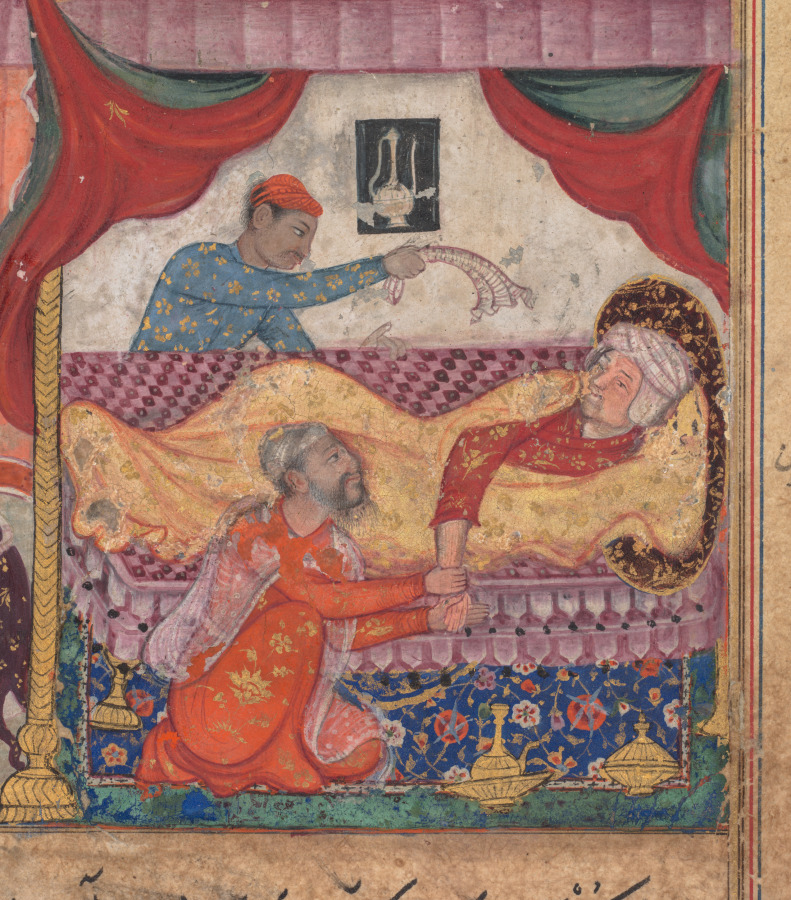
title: The monkey slain, his blood to be used as medicine for the ailing prince he has bitten, from a Tuti-nama (Tales of a Parrot): Fifth Night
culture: Mughal India, court of Akbar (reigned 1556–1605)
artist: Basawan​ (Indian, active mid-1500s)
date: c. 1560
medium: gum tempera, ink, and gold on paper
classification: Painting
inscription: 'amal basāwan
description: Wounded by the chess-playing monkey’s bite, the prince’s hand became increasingly infected. The only cure, his doctors said, was to apply the blood of the monkey to the wound and let it dry. Reluctantly, the prince allowed the monkey to be killed. Two men accomplish this serious work at the left. In the right margin is written the name of the artist, the celebrated Basavana. The Tuti-nama contains the earliest known paintings by the prolific master who was instrumental in shaping the Mughal painting style over subsequent decades.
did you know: Under the covers is the hand that got infected from the monkey bite.